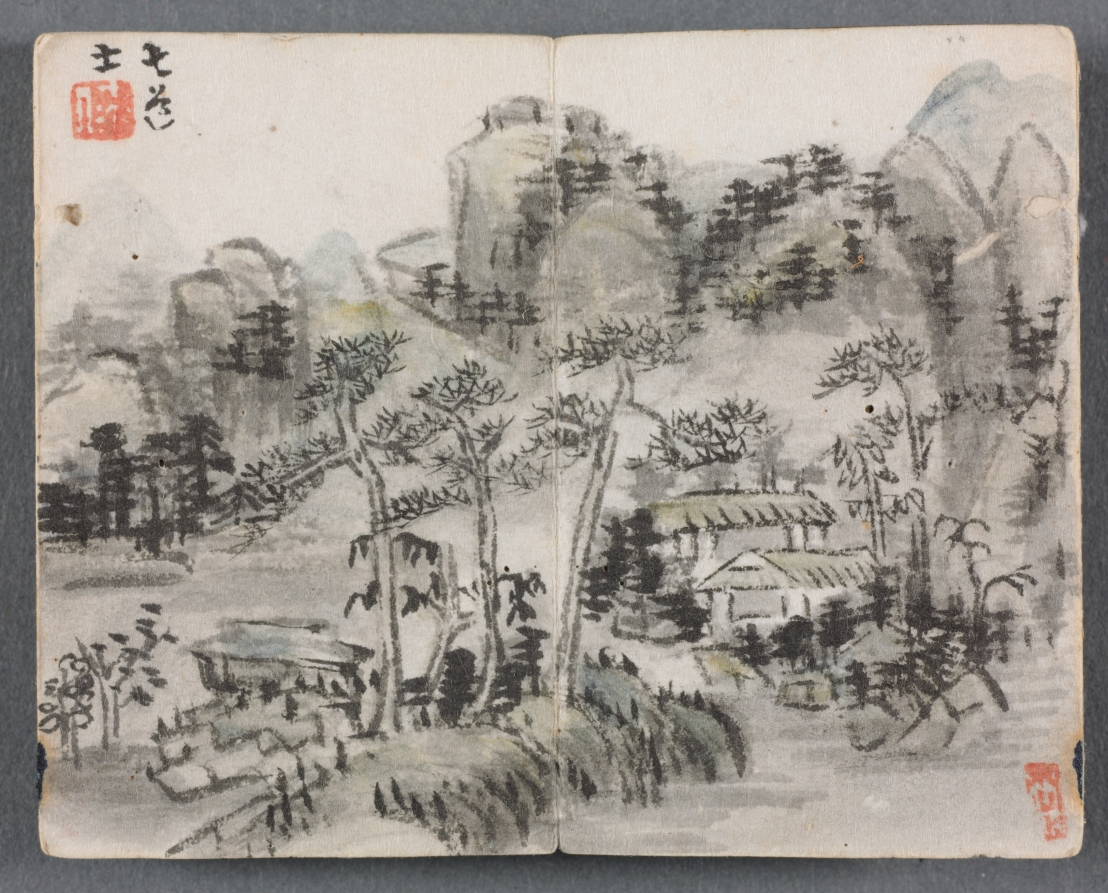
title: Miniature Album with Figures and Landscape (Landscape with Two Buildings)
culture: China, Qing dynasty (1644–1911), Qianlong reign (1736–95)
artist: Zeng Yandong (Chinese, c. 1751–1827)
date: 1822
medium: album leaf, ink and color on paper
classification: Painting